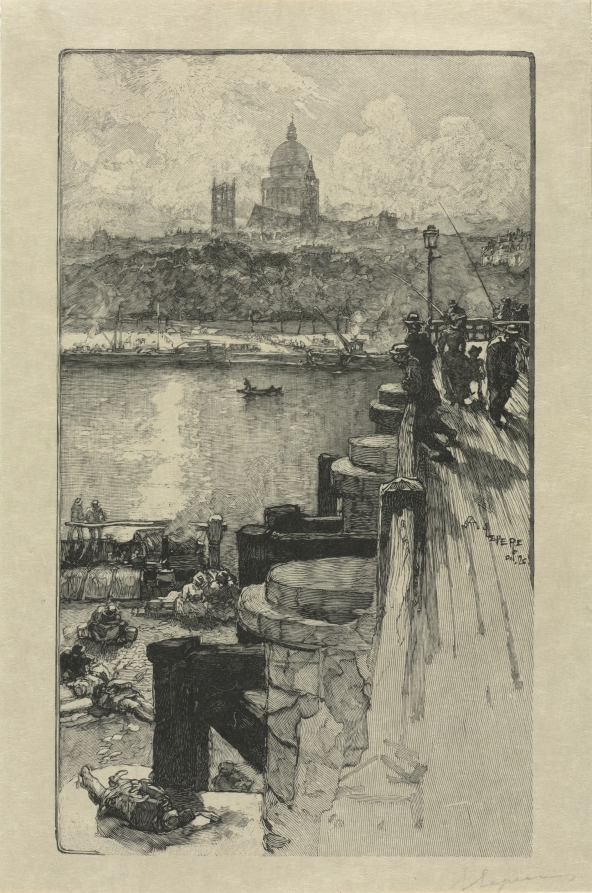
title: Fishermen on a Pier, Paris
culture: France, 19th century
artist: Auguste Louis Lepère (French, 1849–1918)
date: c. 1870–1918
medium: wood engraving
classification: Print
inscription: lower right, in pencil: A Lepere